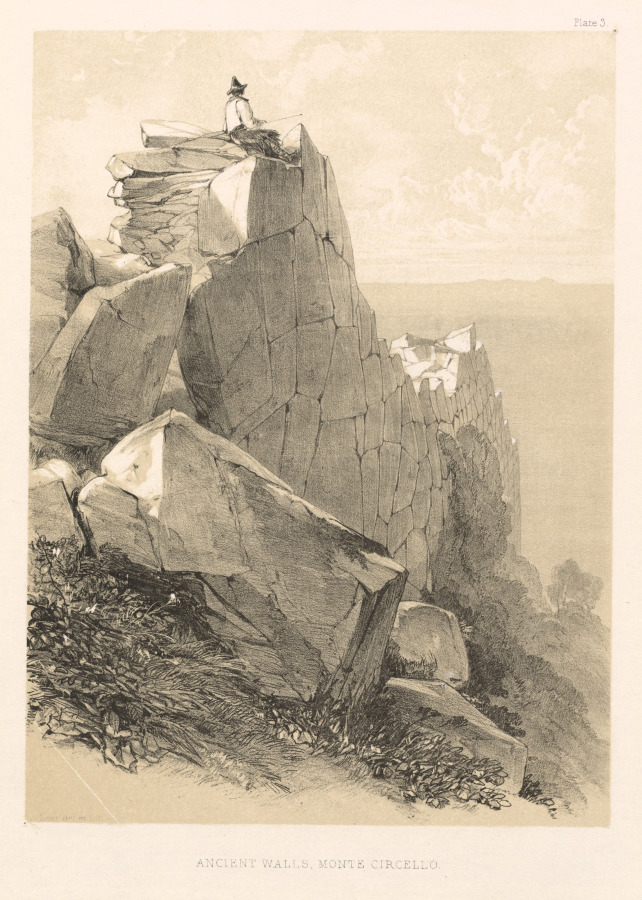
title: Illustrated Excursion in Italy (vol. II): Ancient Walls, Monte Circello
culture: England, 19th century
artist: Edward Lear (British, 1812–1888)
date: 1846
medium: color lithograph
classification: Print